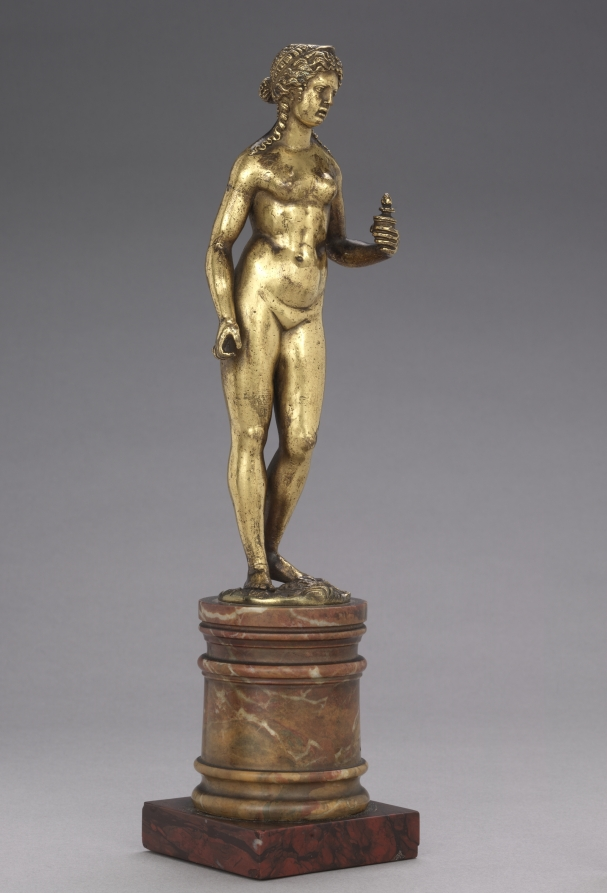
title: Venus with a Burning Urn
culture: Northern Italy, 16th century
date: c. 1500–1520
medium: gilt bronze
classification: Sculpture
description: Venus is the Roman goddess of many virtues, including Love, Charity, Fertility, and Victory. Here, Venus is represented as the goddess of Charity. She wears a crown, as Charity is often depicted as the Queen of the Virtues. The flaming lamp in Venus's left hand was also a symbol of Charity in Venice, where this piece is thought to have originated. The bent fingers of her right hand are bent suggest that Venus may have once held another object. Renaissance sculptors often looked back to antiquity when producing monumental and small bronze statues. The small bronze cabinet piece comes into Italian art during this time, bringing ancient gods and goddesses into Italian households. Venus stands in a contrapposto pose and, like Hellenistic and Roman objects, her locks are tied by a double ribbon while two curls fall on her shoulders. Her tilted head and large emotional eyes, as well as her small nose and parted lips reflect the influence of Hellenistic Greek facial styles.